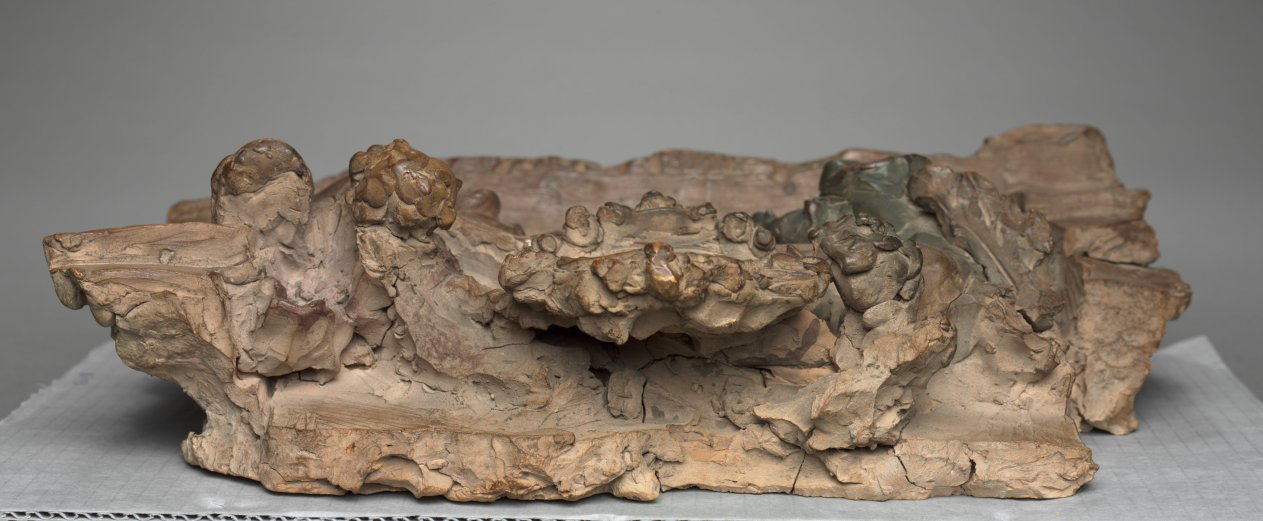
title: Two Angels and Cherubs Bearing an Icon of Christ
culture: Italy, Rome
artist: probably by Paolo Naldini (Italian, 1616–1691)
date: c. 1670–80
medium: terracotta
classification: Sculpture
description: This work is probably a study for a large altarpiece that would have combined several materials, including marble, stucco, and paint. The artist modeled his design in soft clay, which was then hardened by firing; subtle tints suggest the richness of the finished work. The idea of using sculptural figures to support a painted image within an altarpiece was influenced by the work of the Roman sculptor Gian Lorenzo Bernini (1598–1680), with whom Naldini is known to have worked.